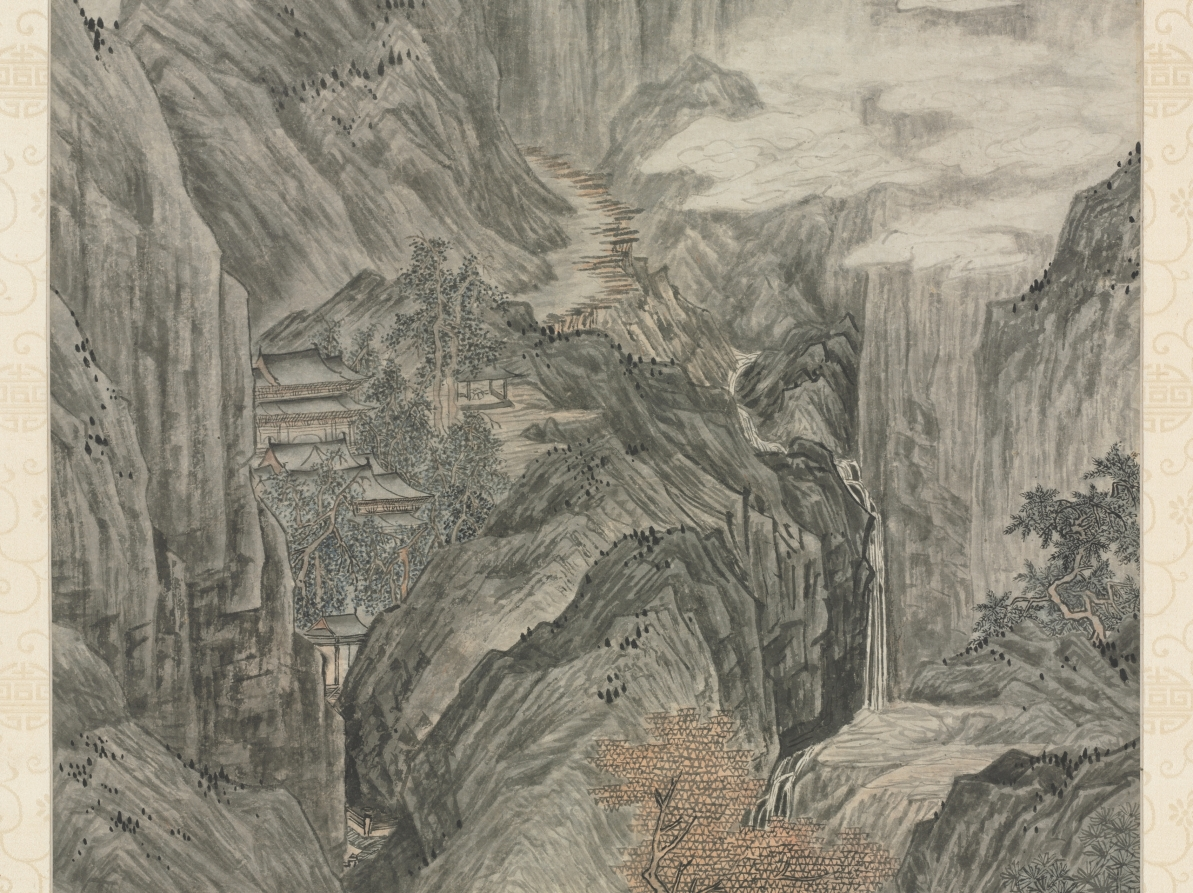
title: Mount Hua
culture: China, Ming dynasty (1368–1644)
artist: Tang Yin (Chinese, 1470–1523)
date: 1506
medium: hanging scroll; ink and light color on paper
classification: Painting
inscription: Artist's inscription, signature, and 4 seals: Wearing a white-bordered scholar's robe and green jade pendants, His life is unconcerned with worldly fame. Like P'an Lang resisting old age through high spirits, Crazy and clumsy he rides his donkey past Mount Hua. T'ang Yin painted this and composed the poem, the first month of the year of the Cheng-te era [1506]. [2 seals] T'ang Tzu-wei yin; T'ang. [2 seals, lower left corner] Po-hu T'ang Yin ssu yin; T'ang Chü-shih. trans. LYSL 12 additional seals: 2 of Wang Shan (1645-1728); 5 of Liu Shu (1759-1816); 1 of Yeh Ao (19th c.); 1 label and 2 seals of Lu Hui (1851-1920); 2 seals unidentified.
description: In this work, Tang Yin accumulates towering mountain summits in the manner of the Sung master, Li Tang, to capture the monumental presence of his subject. Tang Yin’s angular brushstrokes and ink washes of varied intensity give texture to the rocky surface and accent the play of light. Mount Hua is situated in southern Shaanxi province in North China. Hardly accessible during Tang Yin’s time, the mountains were frequented by immortality seekers to dwell or collect herbal drugs there. Tang Yin's potentially brilliant career was shattered in 1499 after he went to the capital to take the jinshi examination. He got entangled in a bribery case that caused him to spend seven years in prison. After his release, Tang returned to Suzhou, and settled on a career as a professional painter. One of Tang's few dated works, Mount Hua was painted seven years after this incident.